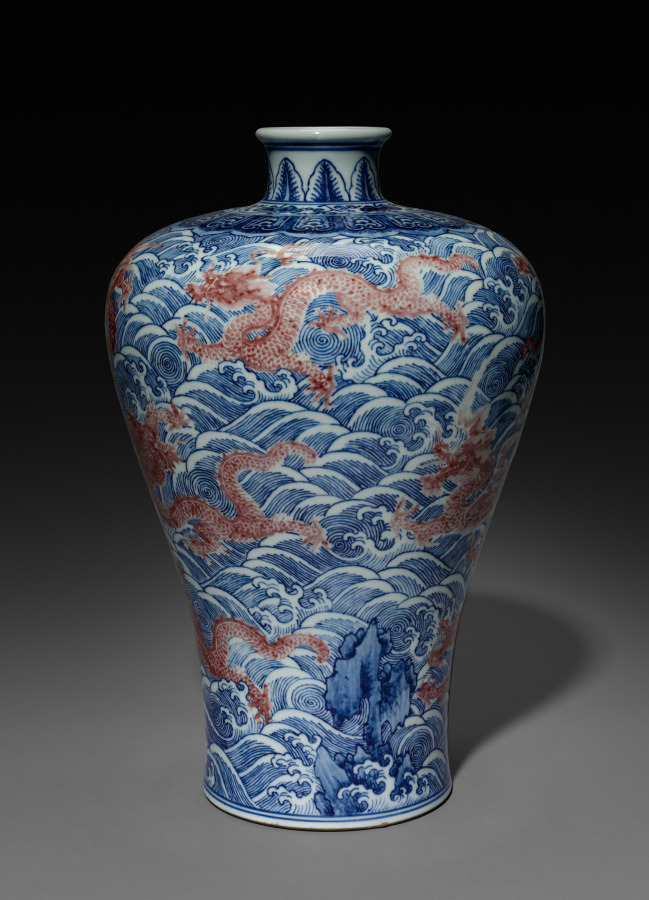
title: Bottle Vase with Dragons and Waves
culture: China, Jiangxi province, Jingdezhen kilns, Qing dynasty (1644-1911), Qianlong mark and reign (1736-95)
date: 1736–95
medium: Porcelain decorated in underglaze cobalt blue and copper red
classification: Ceramic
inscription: 大清乾隆年制